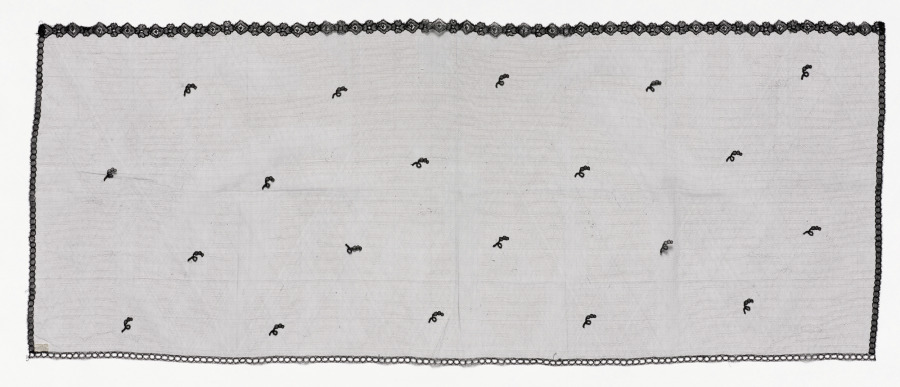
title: Lace Veil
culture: France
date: 1800s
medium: Silk: bobbin lace (Point Plat) appliqué on machine-made net ground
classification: Lace